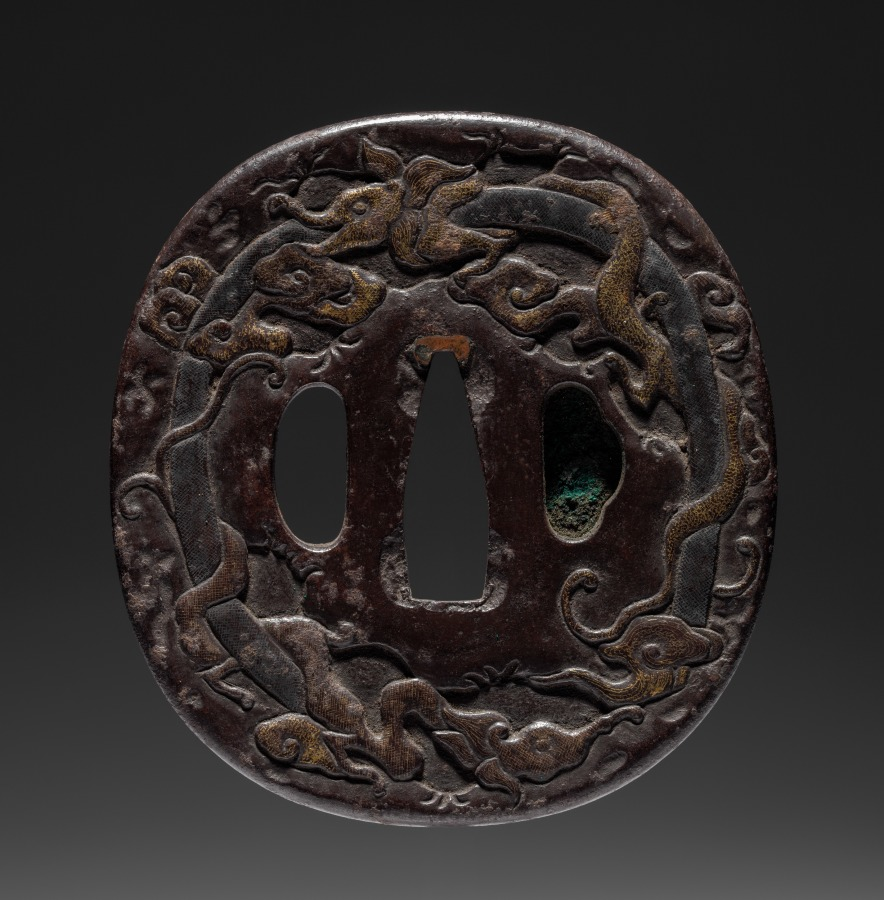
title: Sword Guard (Tsuba) with Dragon and Sacred Jewel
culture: Japan, possibly Edo period (1615-1868)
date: c. 1615–1868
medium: iron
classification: Arms and Armor